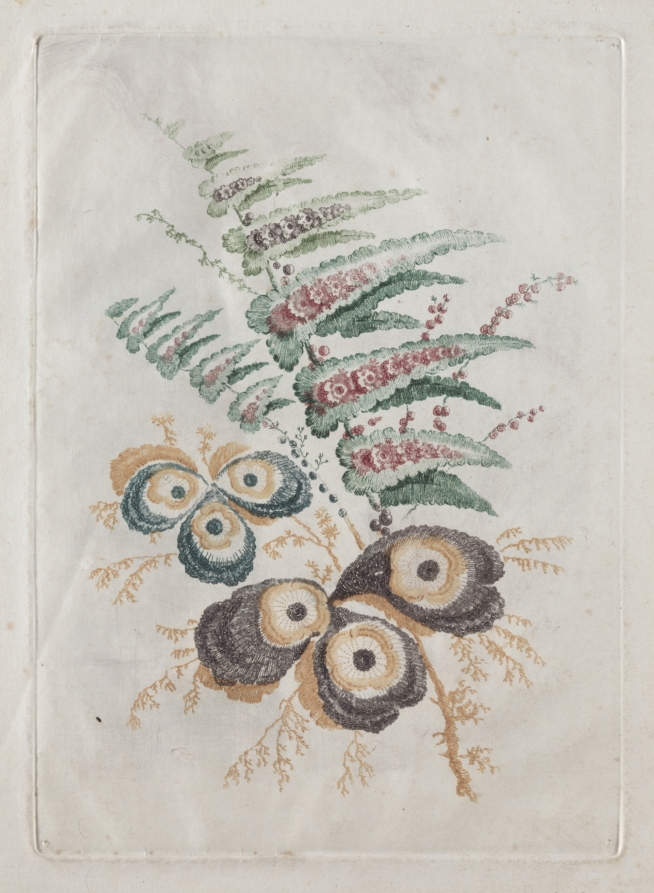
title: New Suite of Portfolios of Flowers Ideal to Use for Designing and Painting: Floral Fantasies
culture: France, 18th century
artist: Anne Allen (British)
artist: after Jean Baptiste Pillement (French, 1728–1808)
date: c. 1796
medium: color etching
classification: Print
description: As a painter and decorative artist,Jean Baptiste Pillement ornamented a broad range of objects including ceramics, textiles, and other household objects. He employed several printmakers to copy his designs that were then disseminated throughout Europe. The best of the printmakers, Anne Allen, colored the etched plate à la poupée. Instead of making a plate for each color, a single plate is selectively inked in different colors using stumps of rags, known as dolls (poupée in French), so that the complete design is printed at one time.